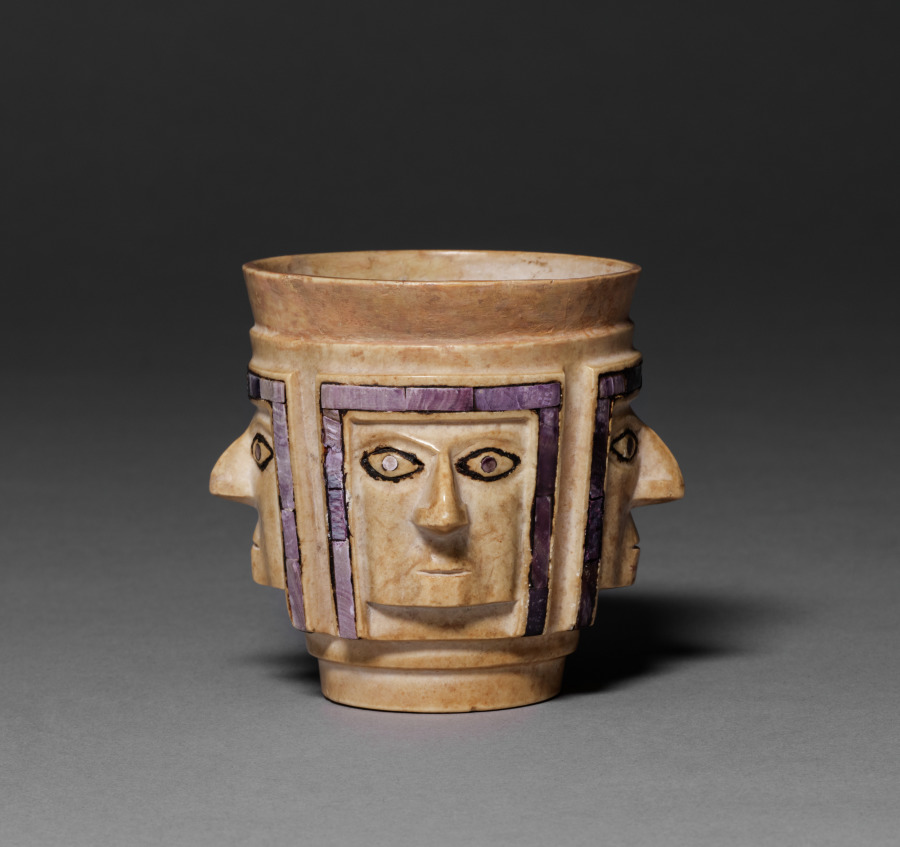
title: Cup with Four Faces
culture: Central Andes, Wari people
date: 600–1000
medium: Stone with shell inlay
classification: Stone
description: The identity of the four, wide-eyed faces on this cup is unknown. Equally mysterious is the cup’s function. It seems too small to be used for drinking beer at the feasts the Wari sponsored to put others in their debt. The size may suggest the cup was used in more intimate circumstances, perhaps to make libations to sacred forces that animated the ancient landscape.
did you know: The inlay is made of spondylus (thorny oyster) shell, a form of wealth in antiquity.